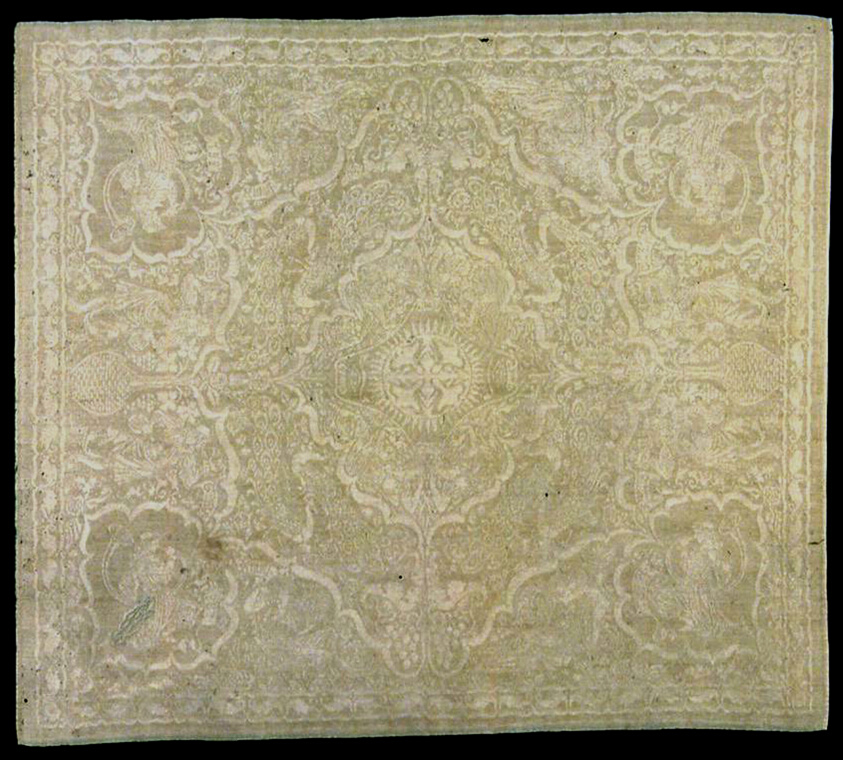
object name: Textile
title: Napkin Depicting The Five Senses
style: Arts and Crafts Movement, british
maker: Designed by Walter Crane (English, 1845–1915); Produced by John Wilson & Sons; England, London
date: 1891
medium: Linen, satin weave self-patterned by reversing of faces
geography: London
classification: textile; weaving